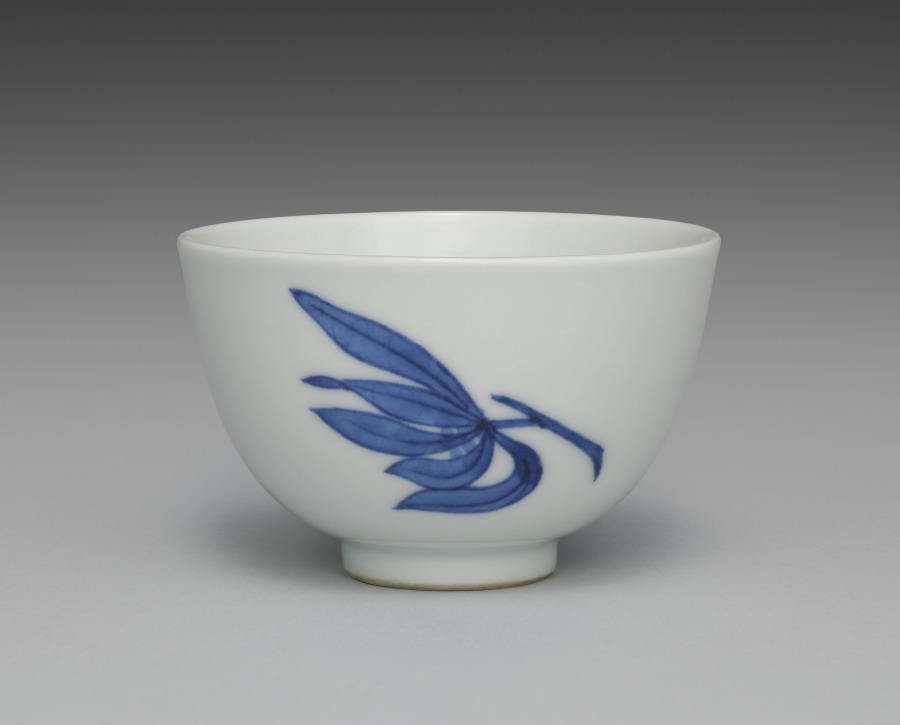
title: Teacup from Tea Set with Orchids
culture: Japan, Meiji period (1868–1912)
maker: Seifū Yohei III (Japanese, 1851–1914)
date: c. 1893–1914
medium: Porcelain with underglaze blue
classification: Ceramic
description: Although the teapot here is stored in a separate box from the five cups, these six pieces may once have been part of a tea set that included other tools such as a water cooler. The teacups have orchid flowers on both sides in underglaze blue, as well as a blue band inside the footring. The teapot has the same design and a blue band painted around the bottom of the lid’s knob. The cups’ long wood storage box is stamped on the exterior, over the lid and base, with a small red seal reading “Satō.” The same seal appears on five small squares of yellow textile, one placed in the bottom of each compartment in the teacup storage box. These are additional to the customary yellow cloths stamped with a “Seifu” seal. Interestingly, four of the Seifū cloths are stamped with an ovoid seal, while the remaining cloth, which is a slightly lighter color, has an unusual seal that is not quite gourd-shaped and with the fū of Seifū in a stylized, unrecognizable form. The teapot has its own box with a Satō seal and is wrapped with an orange textile stamped with the same unusual Seifū seal. A set with a very similar surface design is in the Brooklyn Museum. The Brooklyn set has a water cooler and a small pitcher, in addition to the teapot and cups, and all are in a single storage box. This box records the tea tools as made with kanpakuji, or “bright-jewel white porcelain,” counted among Yohei III’s most important inventions, and carved images. In fact, both sets have a white surface much closer in coloration to the cool white of porcelain clay used in Kyoto at the time, and the designs are simply painted. The Brooklyn set was thus likely mismatched at some point with a box intended for another tea set. Nonetheless, the box may have helped prevent the set’s original components from being dispersed, and the set itself provides insight into how the other tools from the present set may have looked.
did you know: This tea set with orchids has a side-handled pot called a kyūsu, used for steeping, straining, and serving tea.